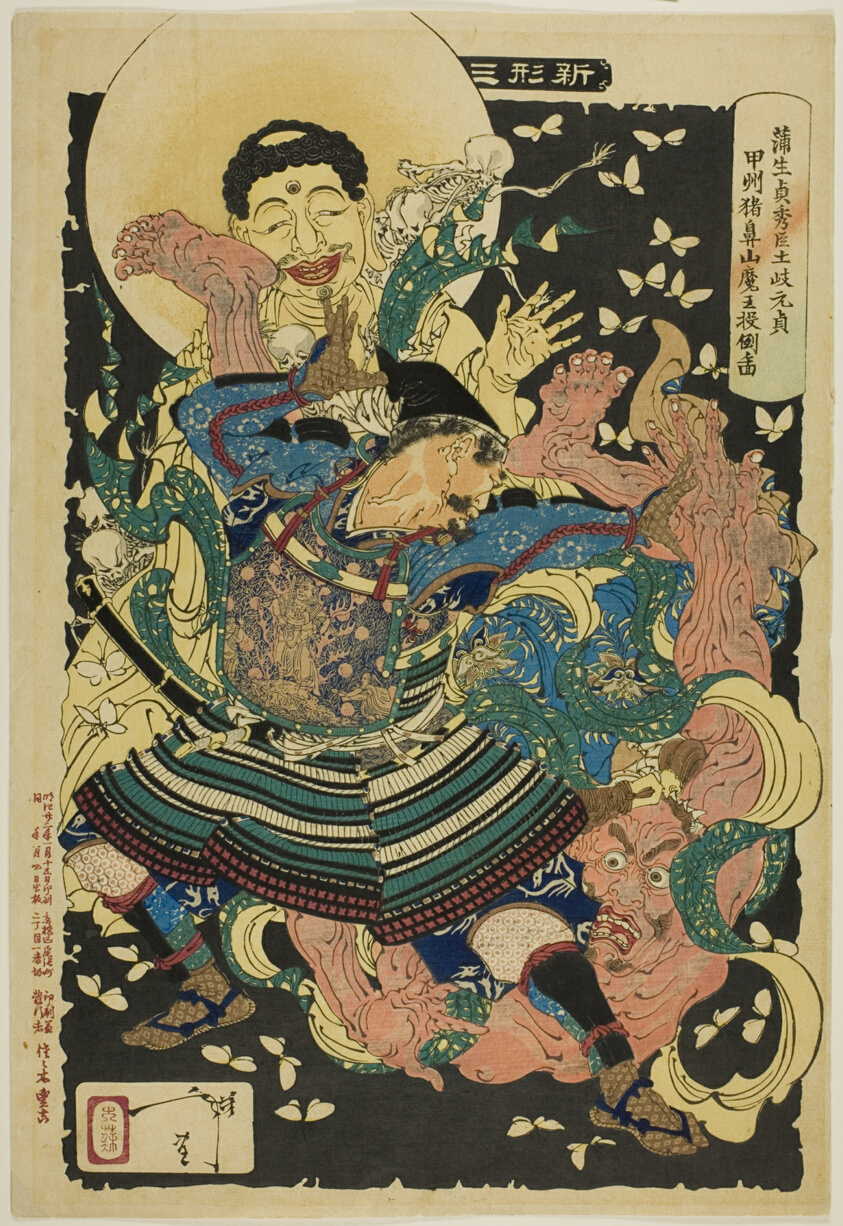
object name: Print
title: Gamo Sadahide's Servant, Toki Motosada, Hurling a Demon King to the Ground at Mount Inahana, from the series "New Forms of Thirty-Six Ghosts (Shinkei sanjuroku kaisen)"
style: Japanese (culture or style)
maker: Tsukioka Yoshitoshi (Japanese, 1839–1892)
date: 1890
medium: Color woodblock print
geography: Japan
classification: woodblock print; print